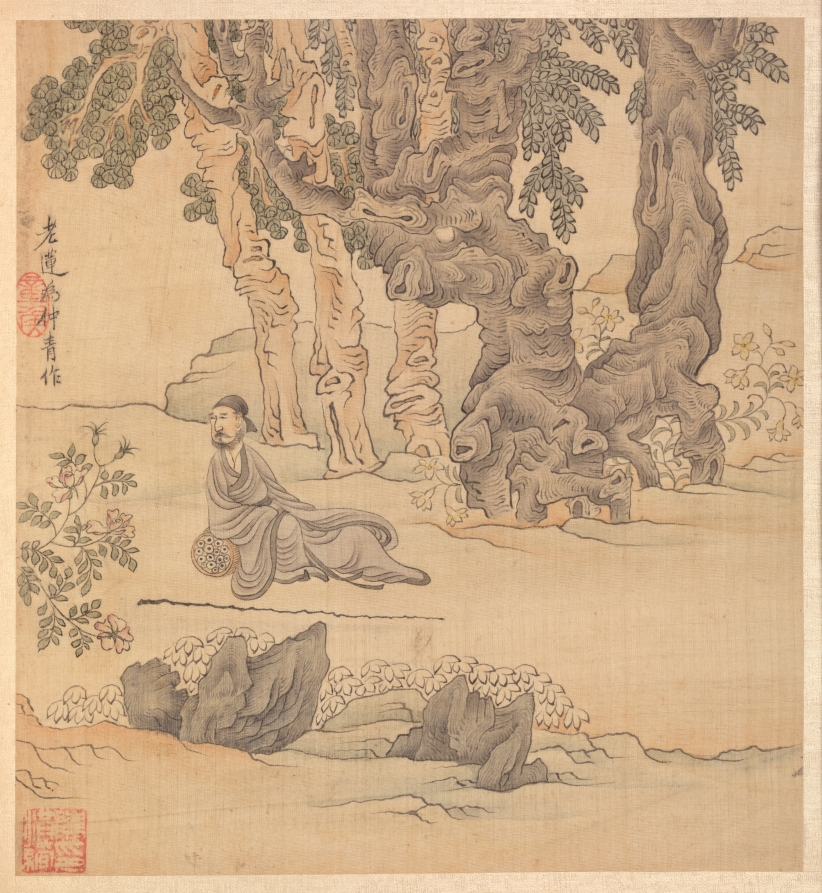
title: Paintings after Ancient Masters: Portrait of Zhongqing in a Landscape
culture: China, Ming dynasty (1368–1644)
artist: Chen Hongshou (Chinese, 1598/99–1652)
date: 1598–1652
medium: album leaf; ink and color on silk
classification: Painting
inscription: Laolin painted for Zhongqing. [2 Seals] Zhanghou; Chen Hongshou yin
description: The twenty paintings in this double-album by Chen Hongshou include landscapes, figures, and flowers. It also has one leaf featuring a woman, an often-used subject not found in the other albums from the latter part of his career. His late works are wonderful summations of Chen's peculiar and quirky art--archaistic, hyper-refined--but without accompanying shallowness or sentimentality. His figures and landscapes in the late albums are miniaturized, not unlike the small Chinese gardens, or the carefully selected small table rocks or old roots used for contemplation to see the world in miniature. This loss of scale is quite deliberate and reflects the psychological situation of a depressed class like the Ming loyalist officials and scholars, deprived of their integrity and honor, and forced to lead a diminished and restricted existence.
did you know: This is a portrait of the artist's friend, Lin Zhongqing, for whom he made this album.